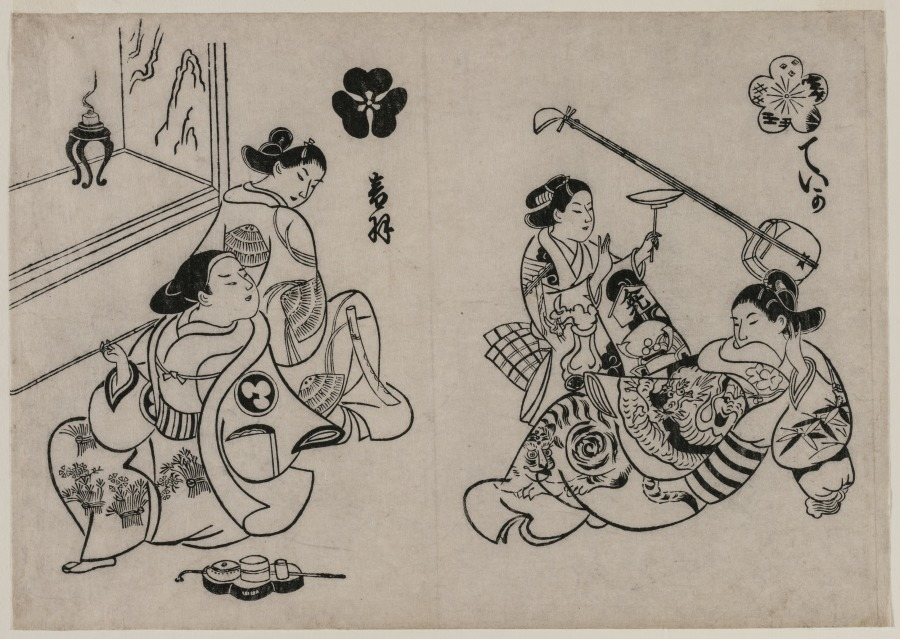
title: Three Courtesans with a Client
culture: Japan, Edo period (1615–1868)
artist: Okumura Masanobu (Japanese, 1686–1764)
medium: color woodblock print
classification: Print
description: This double-page book illustration is called a sumizuri (meaning to print with sumi ink on paper). It may be an adaptation of a picture book by Kiyonobu I titled Keisei ehon, or Illustrated Book of Courtesans, portraying the most glamorous people in the ukiyo-e world. Masanobu had the greatest influence on the development of the ukiyo-e style during the first half of the 1700s. A publisher, print designer, and painter, he initiated new genres of prints such as the "perspective picture" (uki-e).